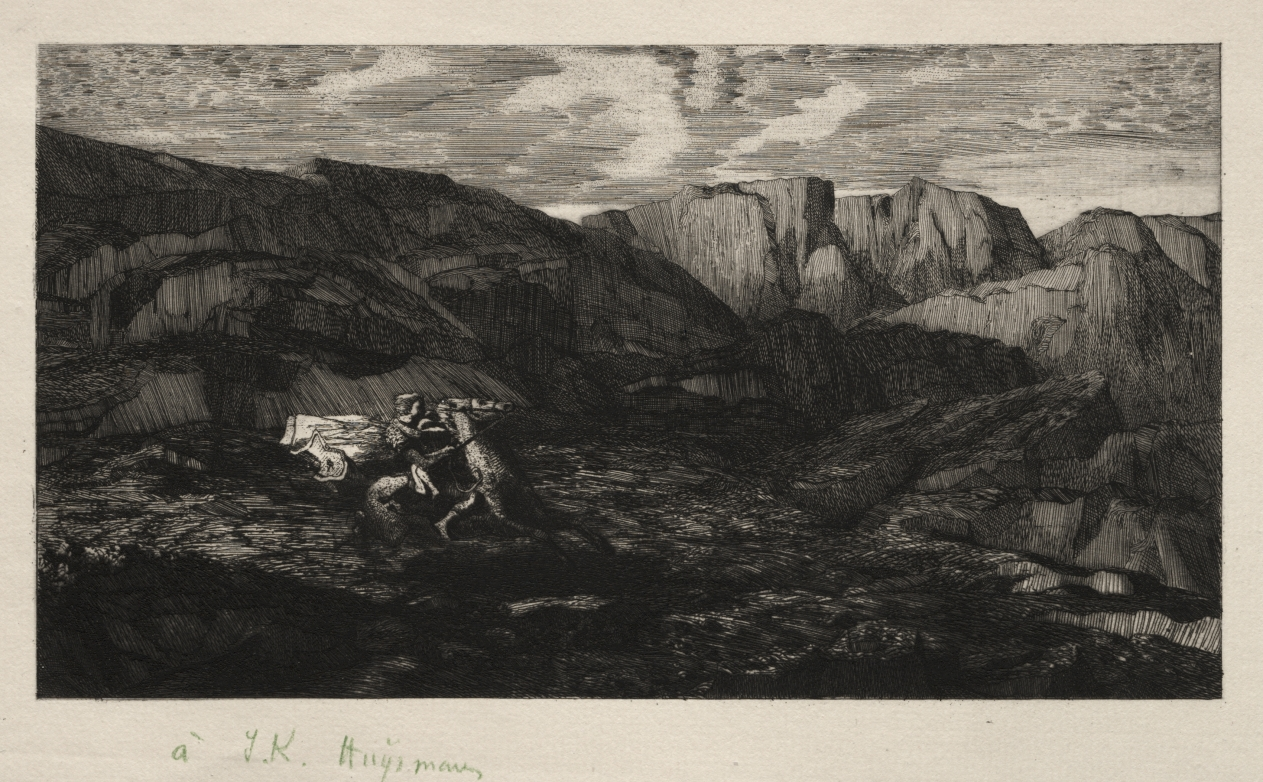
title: Fear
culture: France, 19th century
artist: Odilon Redon (French, 1840–1916)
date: 1866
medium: etching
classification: Print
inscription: signed in green crayon, lower margin: "à J. K. Huysmans / mon ami / Odilon Redon"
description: Odilon Redon used parallel lines of varying density throughout this etching to enhance its tonal and emotional darkness. The subject was inspired by Johann Wolfgang Goethe's 1782 poem describing a father who discovered his child's death after a cold and windy nighttime journey. The figures and the man's white cape contrast dramatically with the scale and tone of their surroundings. Redon made few etchings during his career. This one was a gift to his friend, French art critic and novelist Joris-Karl Huysmans, and features a personalized dedication at the bottom of the sheet.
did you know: An impression of this etching was exhibited in a group of Odilon Redon's work at the 1913 Armory Show, which introduced the artist's work to American audiences.